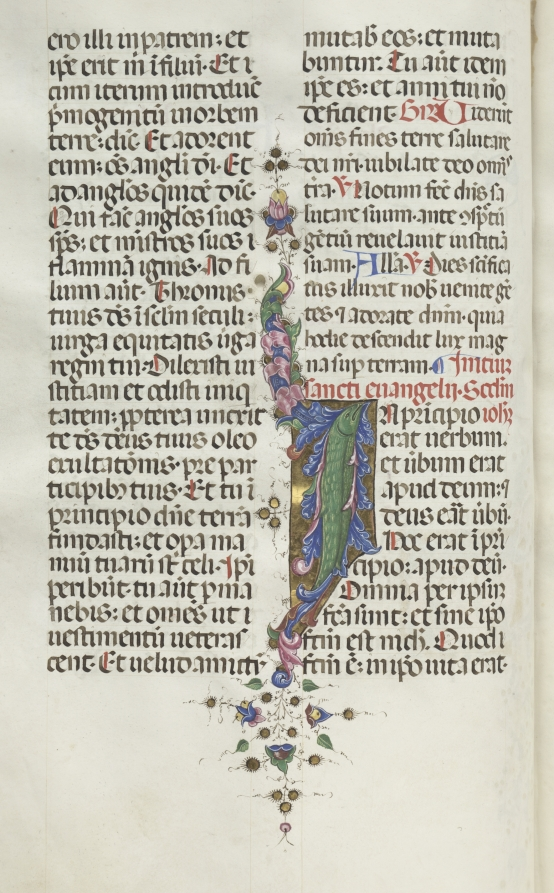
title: Missale: Fol. 22v: Foliage with Fish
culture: Italy, Perugia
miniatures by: Bartolommeo Caporali (Italian, c. 1420–1503)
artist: assisted by Giapeco Caporali (Italian, d. 1478)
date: 1469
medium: ink, tempera and burnished gold on vellum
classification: Bound Volume